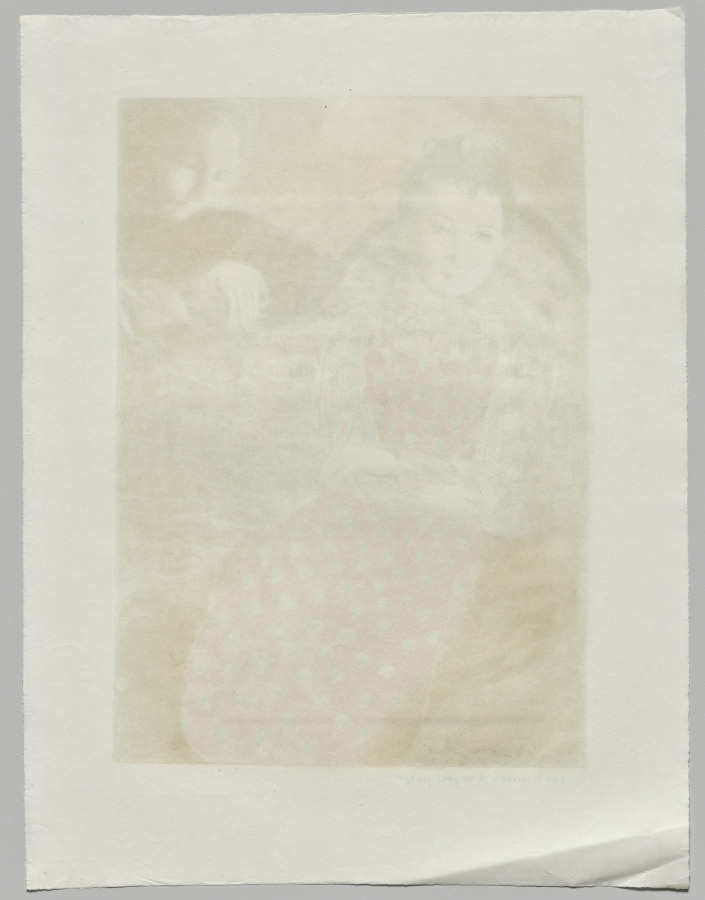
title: On the Pale Silver Sofa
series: Love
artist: Maurice Denis (French, 1870–1943)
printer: August Clot (French, 1858–1936)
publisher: Ambroise Vollard (French, 1867–1939)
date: 1899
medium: color lithograph on wove paper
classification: Print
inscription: Recto, lower left: “sur le canapé d’argent pale”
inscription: In graphite, recto, lower right: “Maurice Denis (signed)”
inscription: In red, recto, lower right within image: “D98 (?)”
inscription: In graphite, recto, lower left: “12”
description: Maurice Denis belonged to the Nabis, a group of artists who came together in 1889 to pursue a radical new style informed by subjective experience and emotion. This print is from a series in which Denis explored his devotion to his wife, Marthe, by depicting her in a variety of settings alongside titles drawn from his own journal. The vague but evocative images were meant to encourage the viewer to draw connections to the theme and meditate on its meaning.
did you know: Maurice Denis was a devout Catholic and often drew visual connections between his wife, Marthe, the subject of this print series, and the Virgin Mary.